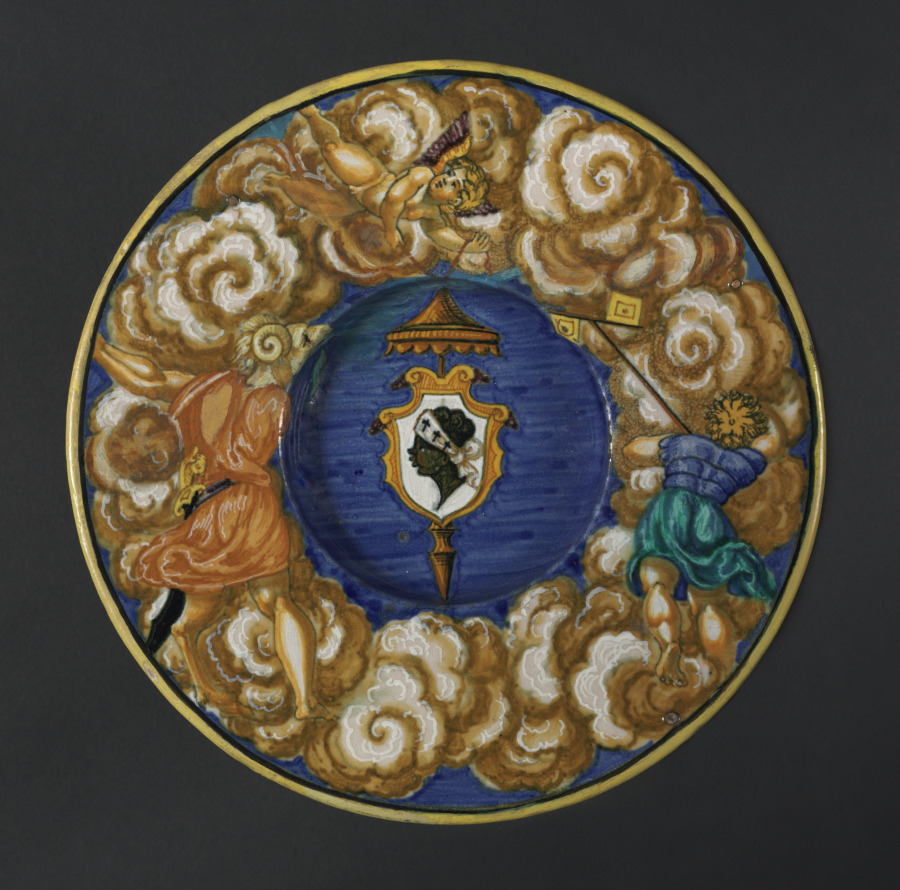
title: Plate with the Arms of the Pucci Family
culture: Italy, Urbino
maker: Francesco Xanto Avelli (Italian, 1487?–1544?)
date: 1532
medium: tin-glazed earthenware (maiolica)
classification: Ceramic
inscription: inscription: F(rancesco) X(anto) A(velli) (da) R(ovigo)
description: Italian nobles of the 1500s often expressed their wealth, social status, and sophistication by ordering large sets of maiolica that sometimes carried their coats of arms or even likenesses, usually in profile as in portraits of the period. The Pucci family was a powerful noble household in Renaissance Florence who were at times quite close allies of the Medici, a prominent banking family.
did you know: A more contemporary head of the family, Emilio Pucci, became famous as a fashion designer in the 1960s and 1970s.